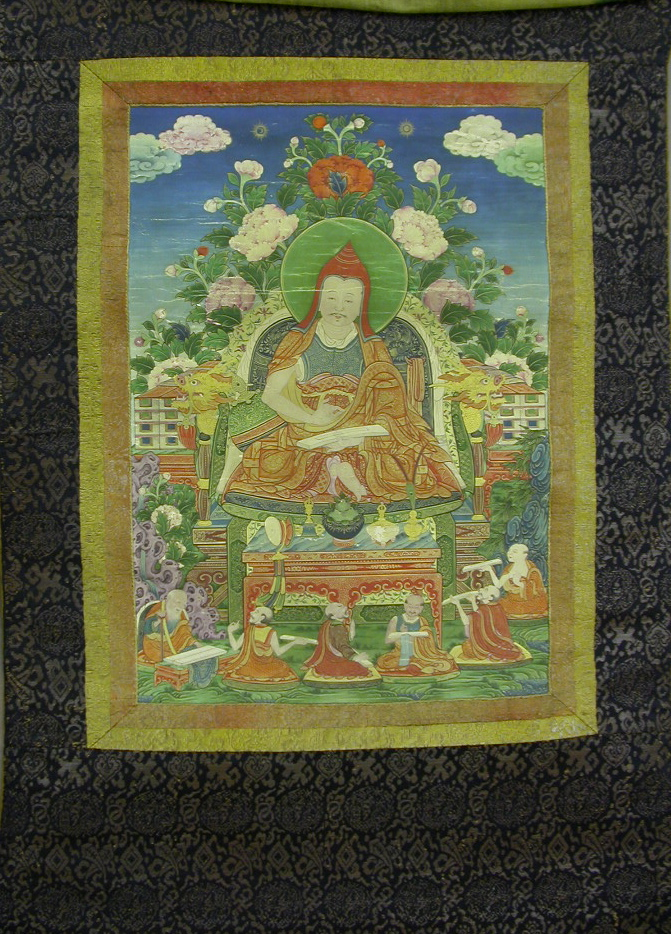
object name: Painting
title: Painted Banner (Thangka) from a Set of Seven Honoring Gayadhara, a Sakya Pandit from India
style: Himalayan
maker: Tibet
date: 19th century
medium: Pigment on cloth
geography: Tibet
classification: hanging scroll; asian art; painting